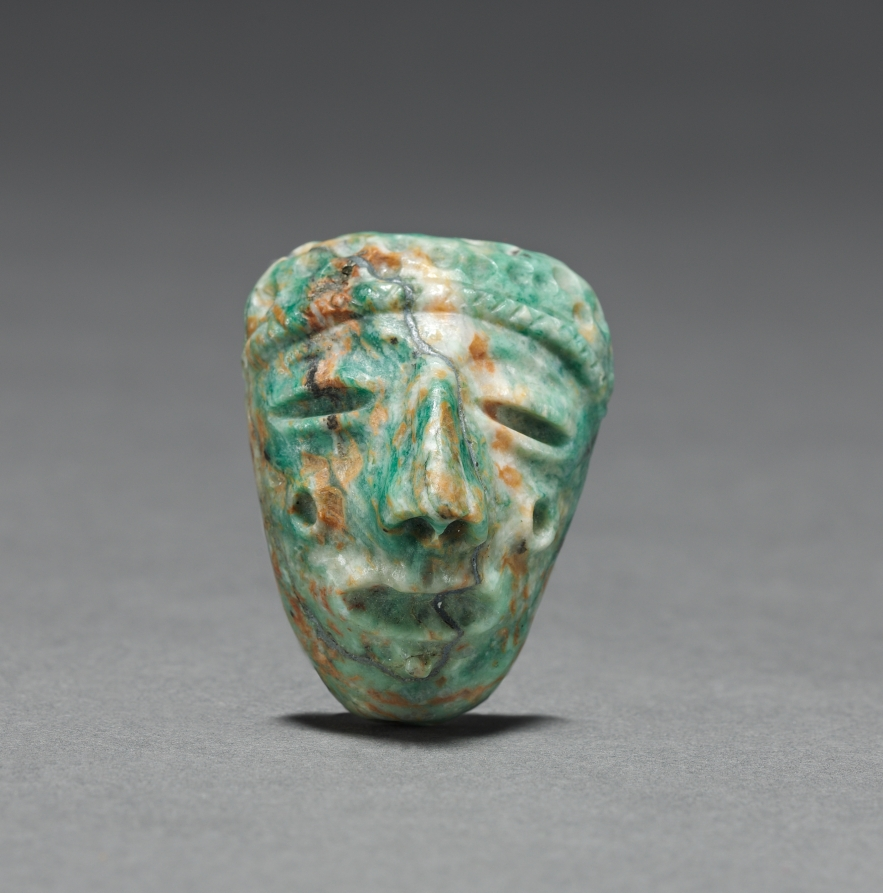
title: Mask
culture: Mexico, Mixtec, Monte Alban V, 14th-16th century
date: 1300–1521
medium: jadeite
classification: Jade